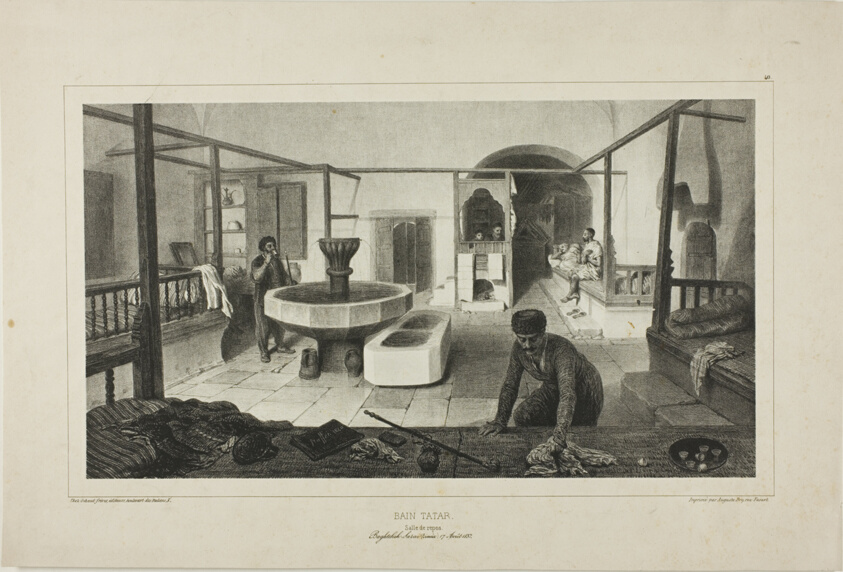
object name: Print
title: Tartar Bath, Resting Room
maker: Denis Auguste Marie Raffet (French, 1804-1860); printed by Auguste Bry (French, 19th century); published by Chez Gihaut Frères (French, 19th century)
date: 1840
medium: Lithograph in black on ivory chine laid down on buff wove paper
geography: France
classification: lithograph; print; prints and drawing